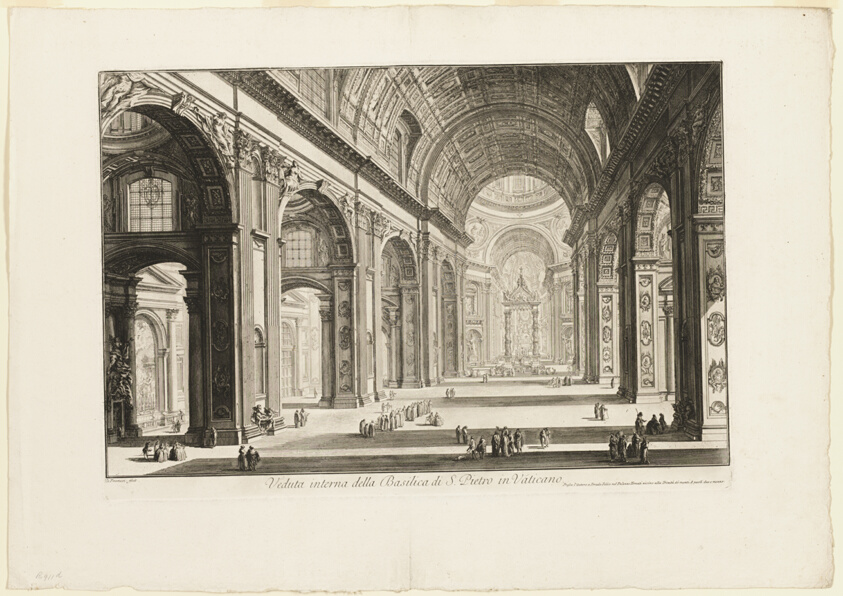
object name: Print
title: Interior view of St. Peter's Basilica in the Vatican, from Views of Rome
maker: Giovanni Battista Piranesi (Italian, 1720-1778)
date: 1748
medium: Etching on heavy ivory laid paper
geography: Italy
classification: etching; print; prints and drawing